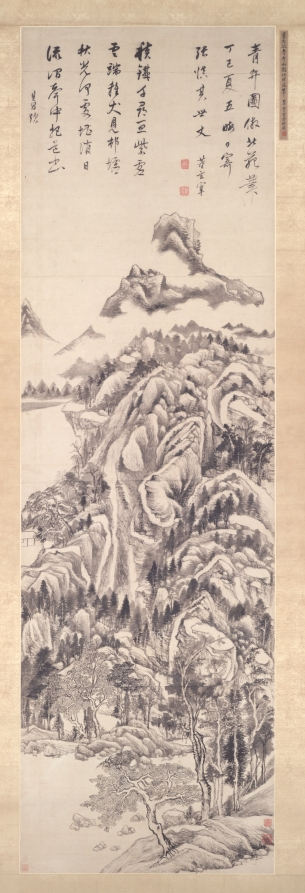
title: Mt. Qingbian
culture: China, Ming dynasty (1368–1644)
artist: Dong Qichang (Chinese, 1555–1636)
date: 1617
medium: hanging scroll, ink on paper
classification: Painting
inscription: Artist's first inscription, signature, and 2 seals: A painting of the Qingbian Mountains in the manner of Beiyuan [Dong Yuan]. In the summer of the dingsi year [1617], on the last day of the fifth month, [I] send this to my senior, Zhang Shenqi. Dong Xuanzai [seals] Zhi zhi hao ri jiang guan 知制誥日講官; Dong Qichang yin 董其昌印.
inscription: Artist's second inscription and signature: Piling irons for ten thousand feet guard the purple sky;/ Where puppies are seen on top of clouds, villages and marketplaces lie./ In the splendor of autumn, where is the most worthy spot to spend the day?/ Amid the rustling sounds of mountain streams, with a volume in hand, meditating on the Way [Dao]. Inscribed by Qichang. (trans. WKH/LYSL)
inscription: 4 additional seals: 3 of Li Enqing 李恩慶 (jinshi of 1833); 1 of Weng Wan-go 翁萬戈 (b. 1918).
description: Dong Qichang radically transforms the landscape composition into a purely abstract design. He organizes the mountain forms to achieve an overall sense of structure, activating the flow of energy (qi) and the momentum of force (shi) throughout the pictorial design. In his art, brush and ink assume life independent of the depicted forms, so that the painting can be appreciated for “the sheer marvels of brush and ink.”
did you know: Dong Qichang had visited the Bian Mountains, which are part of a low range located not far from Wuxing and Lake Tai in the southern province of Zhejiang.